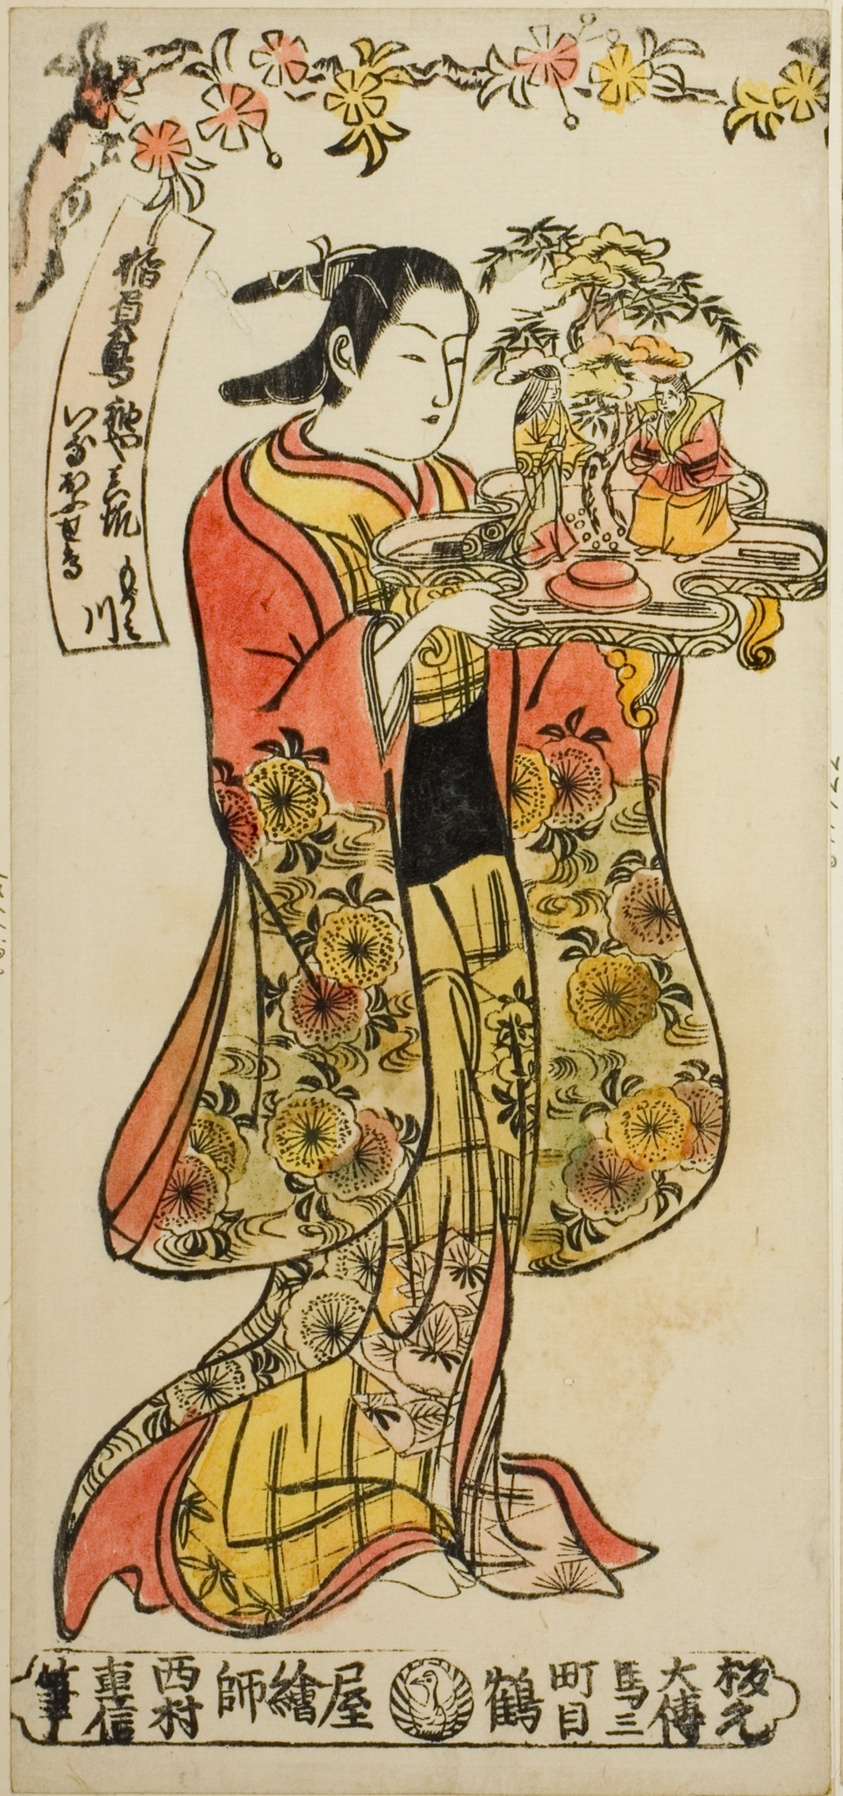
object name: Print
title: Beauty Carrying a Wedding Decoration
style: Japanese (culture or style)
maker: Nishimura Shigenobu (Japanese, active c. 1723-47)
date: c. 1735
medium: Hand-colored woodblock print; left sheet of hosoban diptych, urushi-e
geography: Japan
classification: woodblock print; print; asian art